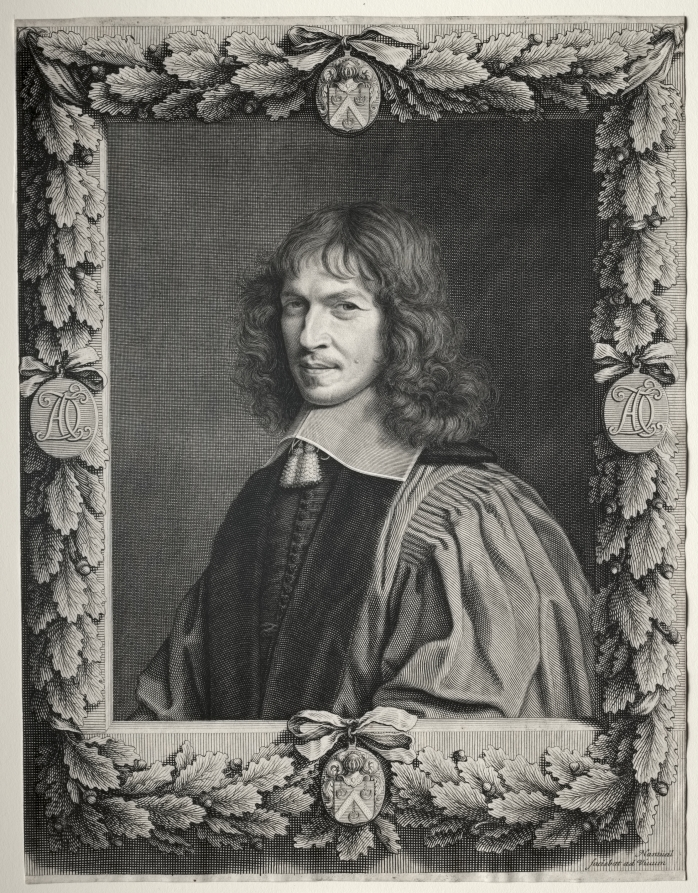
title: Denis Talon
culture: France, 17th century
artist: Robert Nanteuil (French, 1623–1678)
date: 1656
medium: engraving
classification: Print